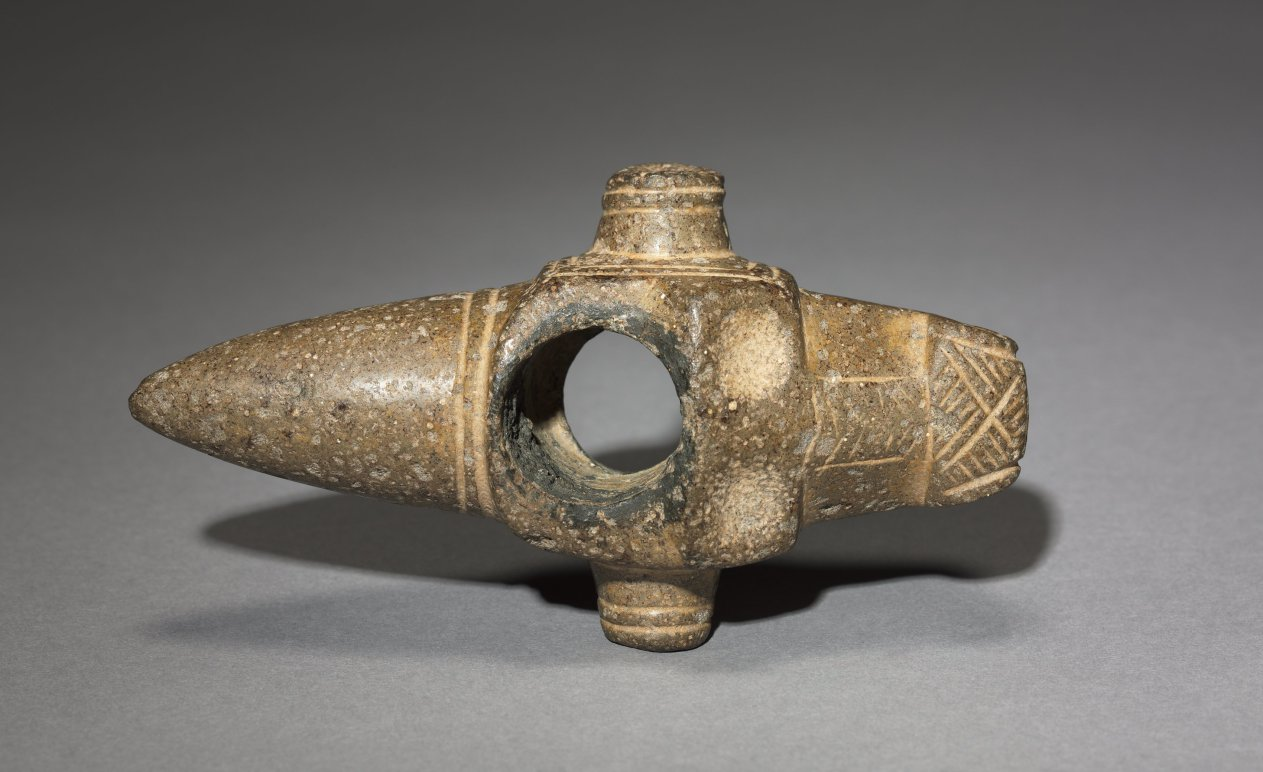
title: Mace Head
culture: Costa Rica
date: 300–500 CE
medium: pecked and polished gray stone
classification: Sculpture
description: Once mounted on wooden shafts, elaborately shaped mace (club) heads like this one probably were not used as weapons. Rather, they could have served as emblems of chiefly authority, group insignia, the heads of ceremonial weapons, or all three. They eventually were placed in elite graves. The back-curled nose on this example may refer to a crocodile or caiman.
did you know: In ancient Costa Rica, it was believed that the world rested on the back of a crocodile.